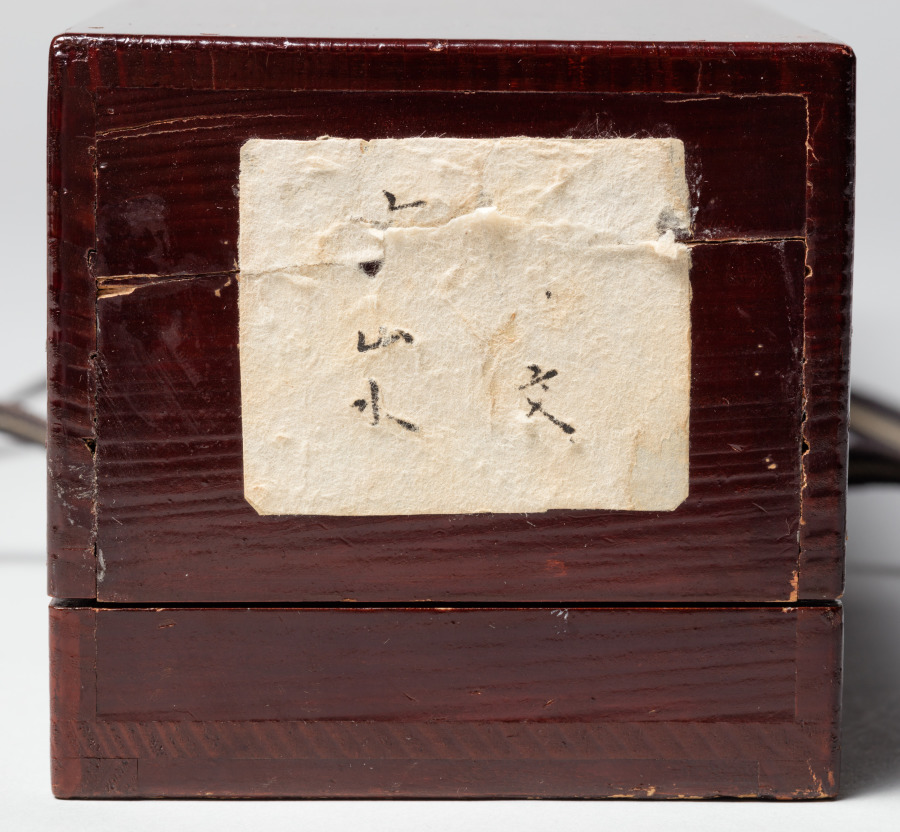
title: Landscape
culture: Japan, Muromachi period (1392–1573)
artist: Judō (Japanese, active 16th century)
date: 1500s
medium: hanging scroll, ink and light color on paper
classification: Painting